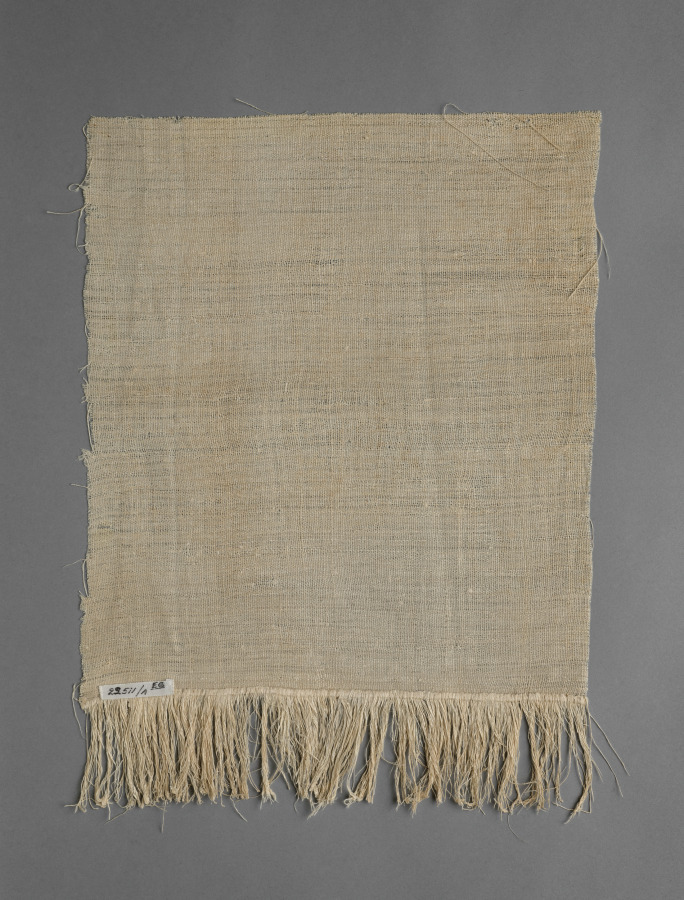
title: Mummy Linen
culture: Egypt, New Kingdom (1540–1069 BCE), Dynasty 18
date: 1550–1291 BCE?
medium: plain weave: linen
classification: Textile